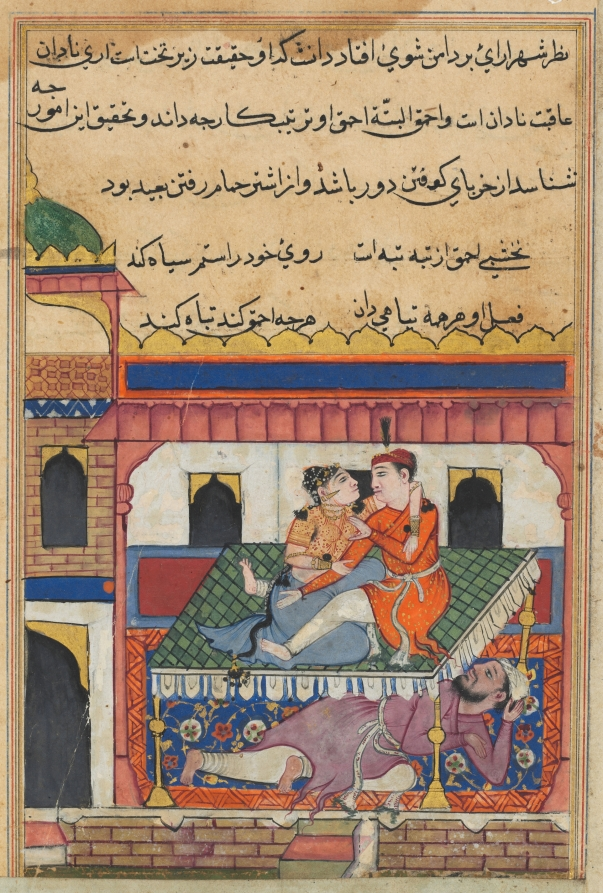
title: Shahr-Arai and her lover dallying on a bed beneath which is concealed her husband, from a Tuti-nama (Tales of a Parrot): Fortieth Night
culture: Mughal India, court of Akbar (reigned 1556–1605)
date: c. 1560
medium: gum tempera, ink, and gold on paper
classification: Painting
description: Shahr-Arai’s husband hides under his wife’s bed in an attempt to catch her in a love affair. Despite his precautions, the ends of his purple robe peek out from beneath the bed. When Shahr-Arai sees this, she quickly concocts a plan to trick her husband and protect her lover.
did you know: Shahr-Arai loudly proclaims that her lover is an adopted brother who will protect the husband’s life.